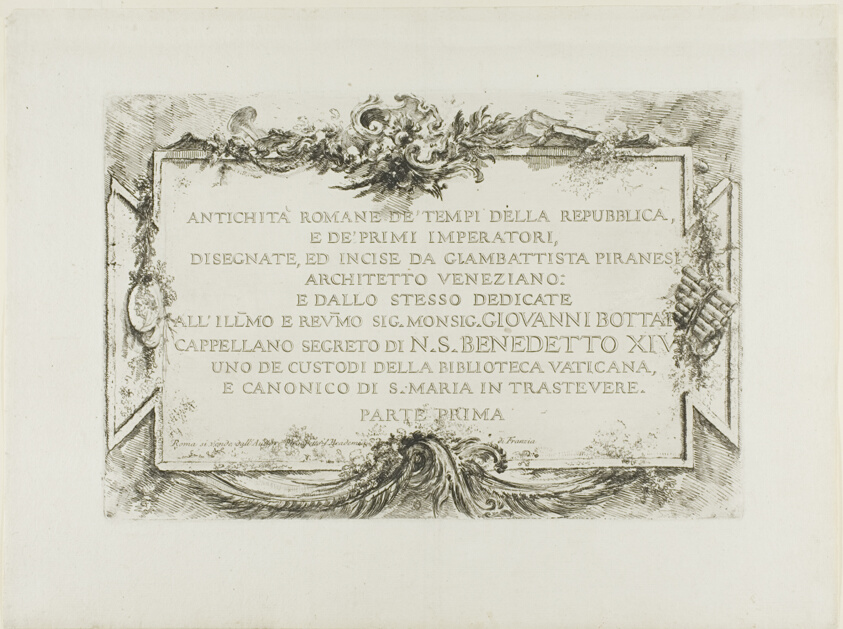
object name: Print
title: Frontispiece, from Roman Antiquities, Part I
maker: Giovanni Battista Piranesi (Italian, 1720-1778)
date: 1748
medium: Etching on ivory laid paper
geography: Italy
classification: etching; print; prints and drawing